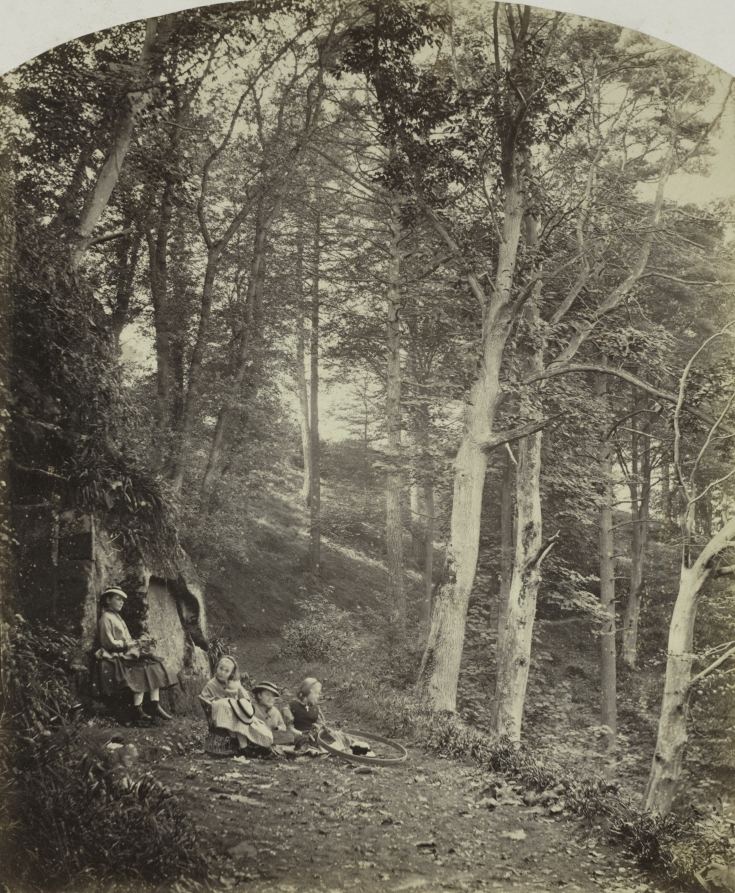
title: A Path Through a Wood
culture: England, 19th century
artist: Major Francis Gresley (British)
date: c. 1860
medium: albumen print from wet collodion negative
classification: Photograph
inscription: Written in pencil on recto of mount: "Major Gresley [something else written and circled]"; on verso: an oval outlined in gold